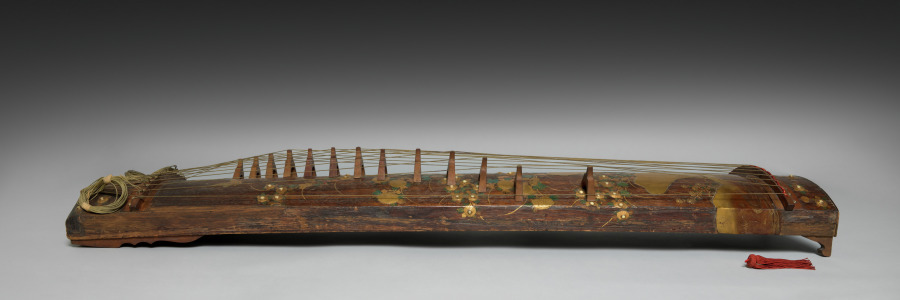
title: Koto (Zither)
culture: Japan, Edo period (1615–1868)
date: early to mid-1800s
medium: Wood with colored lacquer, sprinkled gold powder (maki-e), textile, and silk strings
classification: Musical Instrument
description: This koto has an elaborately decorated surface, suggesting that it was meant to be admired as a decorative object rather than played as a musical instrument. The vertical design shows a profusion of chrysanthemum flowers and miscanthus grass above a brushwood fence as well as a pair of butterflies.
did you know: The koto descended from the guzheng, a Chinese zither first imported to Japan in the seventh century.